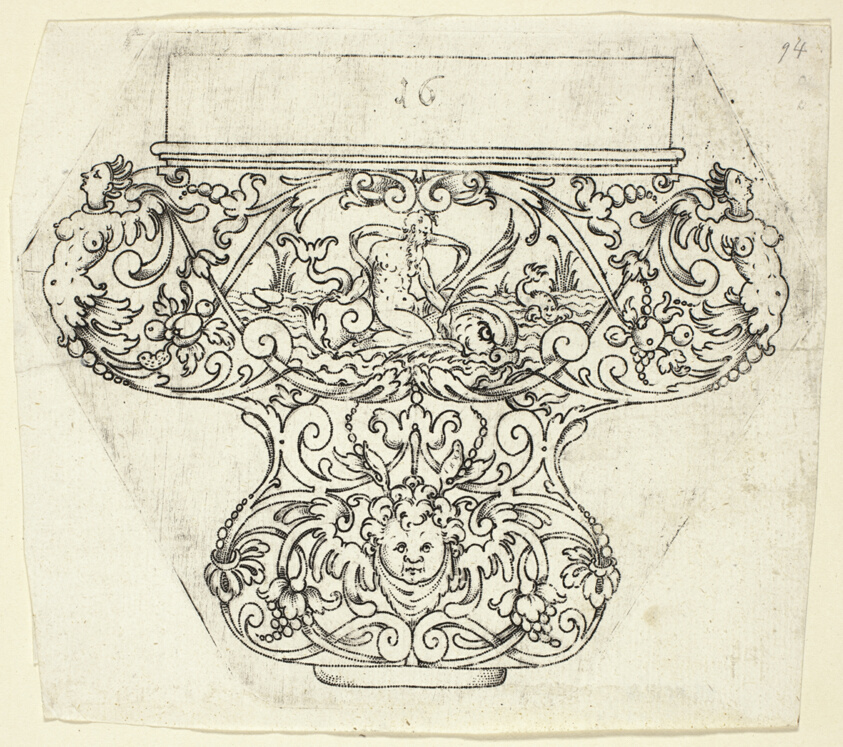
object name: Print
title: Plate 16, from twenty ornamental designs for goblets and beakers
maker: Master A.P. (German, active early 17th century)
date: 1604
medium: Punch engraving in black on ivory laid paper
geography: Germany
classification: engraving; print; prints and drawing